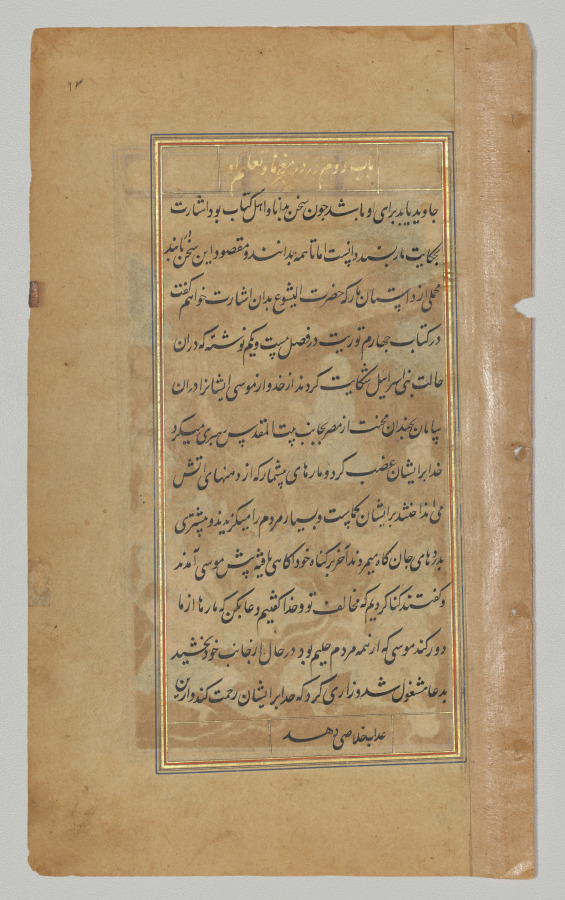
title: Text page from a Mirror of Holiness (Mir’at al-quds) of Father Jerome Xavier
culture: Mughal India, Allahabad, made for Prince Salim (1569–1627)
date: 1602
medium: Ink and gold on paper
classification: Manuscript